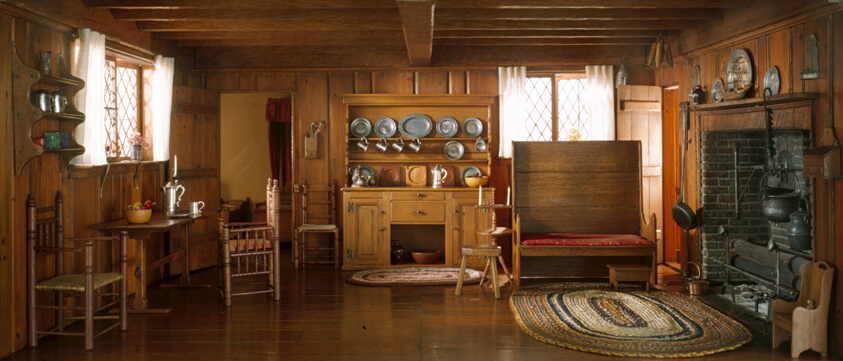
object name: Miniature room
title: A1: Massachusetts Living Room and Kitchen, 1675-1700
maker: Designed by Narcissa Niblack Thorne; American, 1882-1966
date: c. 1940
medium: Miniature room, mixed media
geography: United States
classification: miniature; thorne rooms